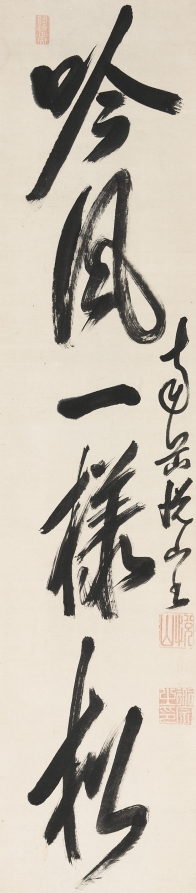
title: Calligraphy in Semi-Cursive Style (xing-caoshu)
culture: China, Qing dynasty (1644-1911)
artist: Yueshan Daozong (Chinese, 1629–1709)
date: c. 1660–1709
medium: hanging scroll; ink on paper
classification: Calligraphy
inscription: 吟風一樣松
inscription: 悅山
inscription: 道宗之印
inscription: Linji zheng zong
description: This bold calligraphy written by Yueshan, an Ōbaku school monk, consists of five characters tentatively translated as “Pine trees singing in the wind.” The line is from Cold Mountain Poems (Hanshan shi). Cold Mountain is the pen name (hao) of the poet monk Han Shan, as well as the name of a place. In one poem Han describes getting lost on the road to Cold Mountain, perhaps an allusion to the search for religious enlightenment.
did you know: The Ōbaku school of Chan (Zen in Japanese) Buddhism was founded in Japan by Chinese monks in the 1600s. The monk Yueshan emigrated from the Chinese province of Fujian to serve as priest and later abbot at Manpukuji, the headquarters of the Ōbaku school in Japan.